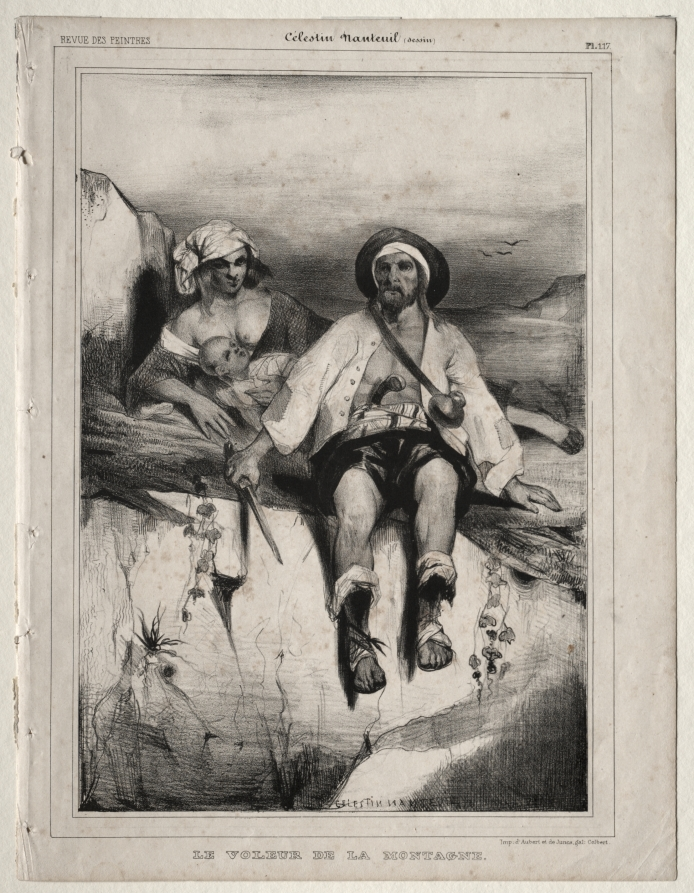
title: The Robber from the Mountain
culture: France, 19th century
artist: Célestin François Nanteuil (French, 1813–1873)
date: mid–1800s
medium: lithograph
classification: Print